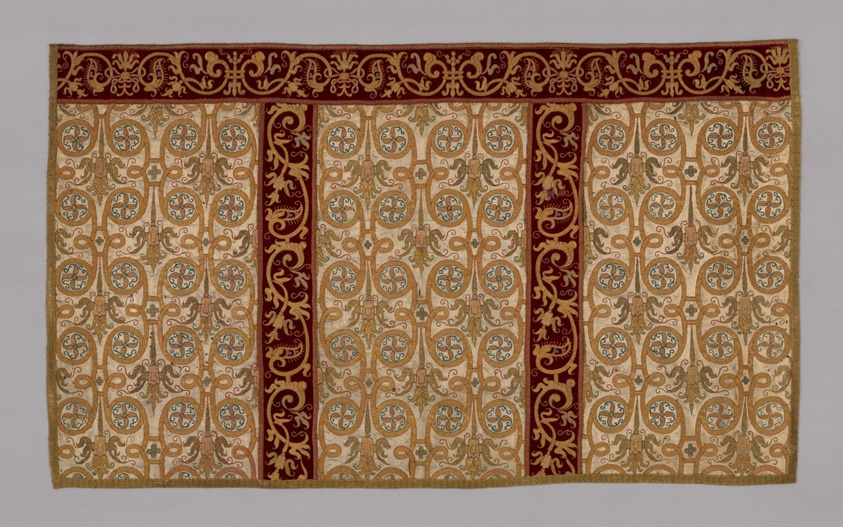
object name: Religious/Ritual Object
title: Altar Piece (Part of a Chasuble)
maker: Spain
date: 17th century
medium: White satin embroidered with couched rose, blue, and gold cord. Red velvet orphrey.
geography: Spain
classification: textile; needlework (visual works); liturgical; weaving; ritual objects